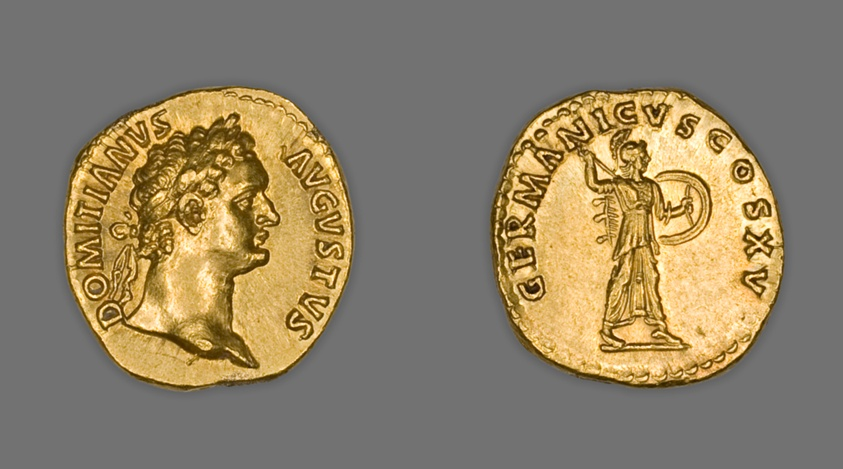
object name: Coin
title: Aureus (Coin) Portraying Emperor Domitian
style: imperial (roman), ancient, roman (ancient, style or period)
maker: Roman, minted in Rome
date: 90-91, issued by Domitian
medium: Gold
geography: Rome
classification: coin; ancient art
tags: portraits, goddesses, gods (deities)